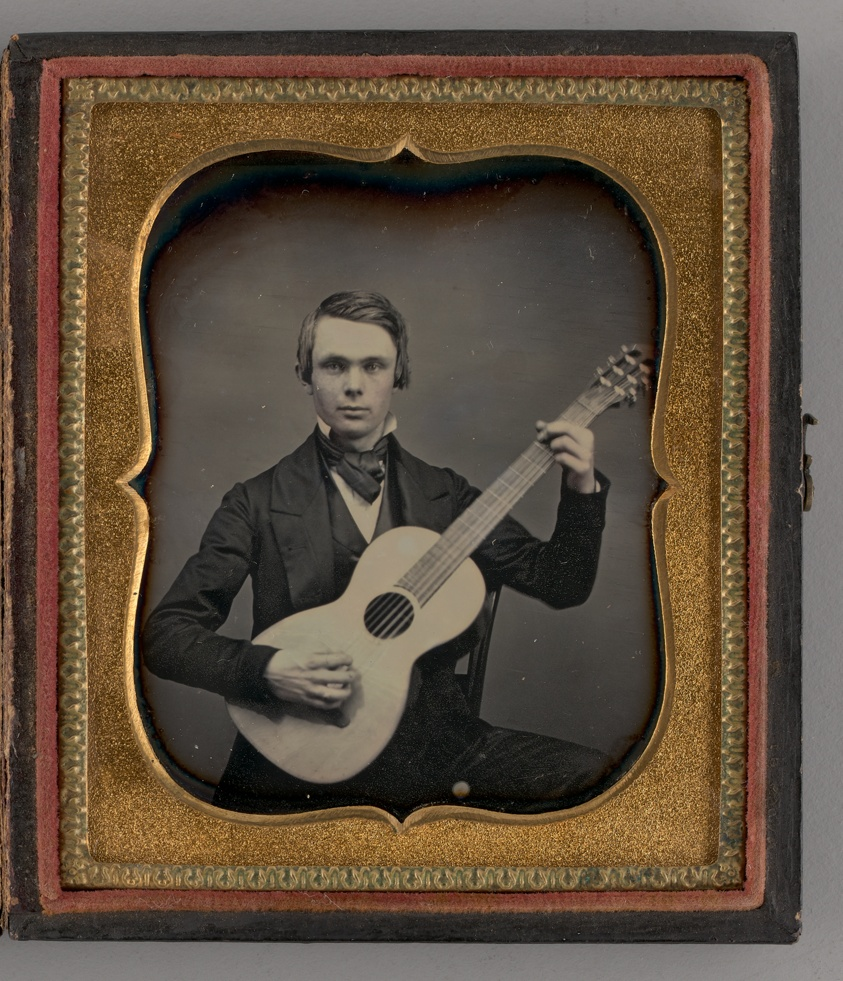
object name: Photograph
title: Untitled (Portrait of a Man Holding a Guitar)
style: 19th century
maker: Unknown maker; American, 19th century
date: 1855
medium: Daguerreotype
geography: United States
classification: portrait; photography; photographic process; photograph; daguerreotype; portrait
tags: lundberg collection, photography, portrait, portraits, portraits: male subject, guitars, musical instruments, musicians, men, Male